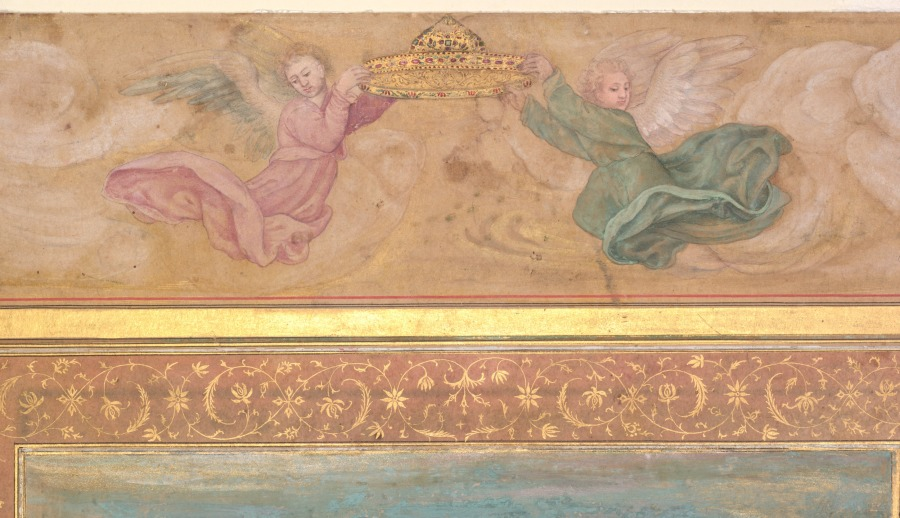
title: Shah Jahan holding a spinel and a long Deccan sword, from the Late Shah Jahan Album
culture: India, Mughal, 17th century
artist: attributed to Hashim (Indian, active 1598-c.1650)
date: c. 1650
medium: Gum tempera and gold on paper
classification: Painting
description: This page came from an imperial album assembled for Shah Jahan toward the end of his reign. Only portraits of the emperors have angels hovering with a crown in the top border along with the predator peacefully paired with his prey below. Shah Jahan chose to link these symbols of peace and justice with divine sanction for his rule, as indicated by the light of the sun and moon behind his head. Royal retainers carry emblems of sovereignty in the left border. Imperial Mughal painting reached a pinnacle of refinement and formality under Shah Jahan. The artists reveal astonishing skill in their ability to render the subtle texture of the feather in his turban crest, the gleam of every jewel, the softness of his beard, and the delicacy of his costly translucent muslin robe. In his hand Shah Jahan holds a ruby-like gemstone called a spinel, prized among the Mughals for its talismanic properties of protection during battle.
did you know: The finest fabric was the most transparent, like the Emperor’s New Clothes.